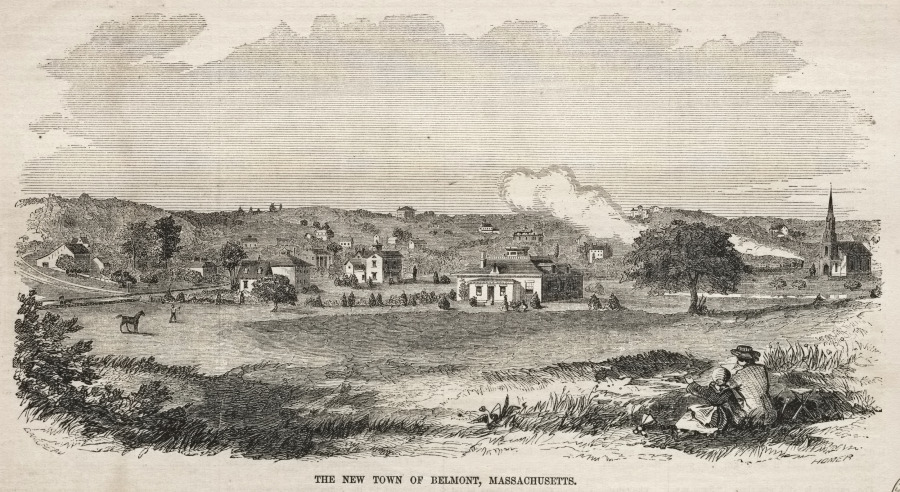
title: The New Town of Belmont, Massachusetts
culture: America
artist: Winslow Homer (American, 1836–1910)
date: 1859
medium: wood engraving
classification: Print